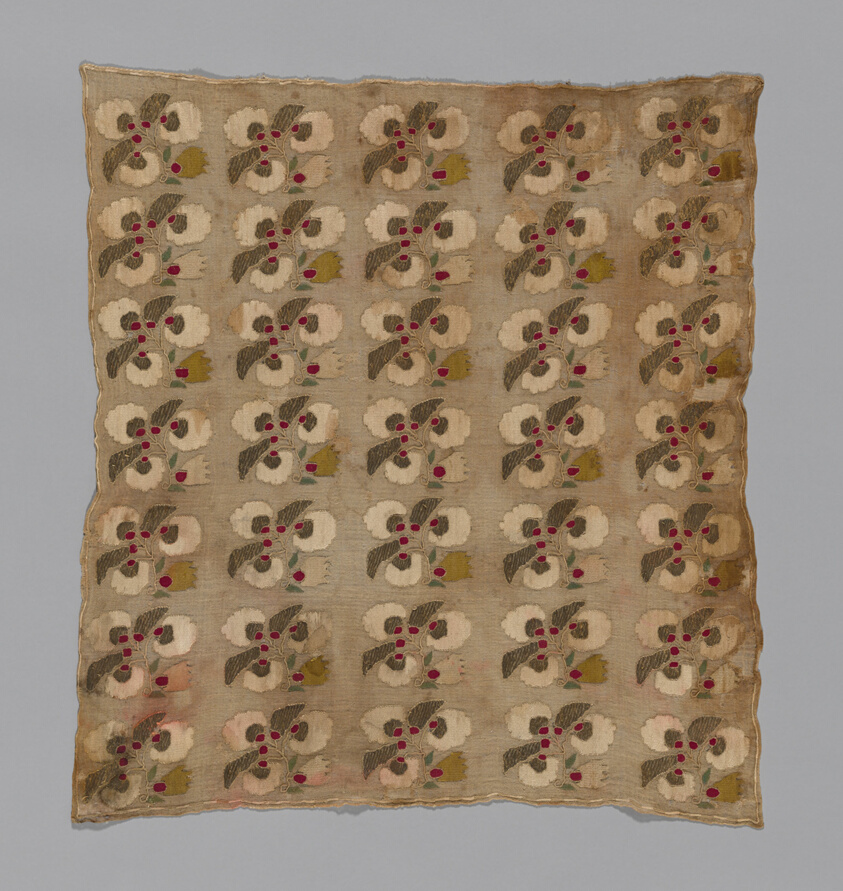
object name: Textile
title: Cover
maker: Turkey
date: 18th century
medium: Square, with floral embroidery repeated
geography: Turkey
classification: textile; needlework (visual works); weaving